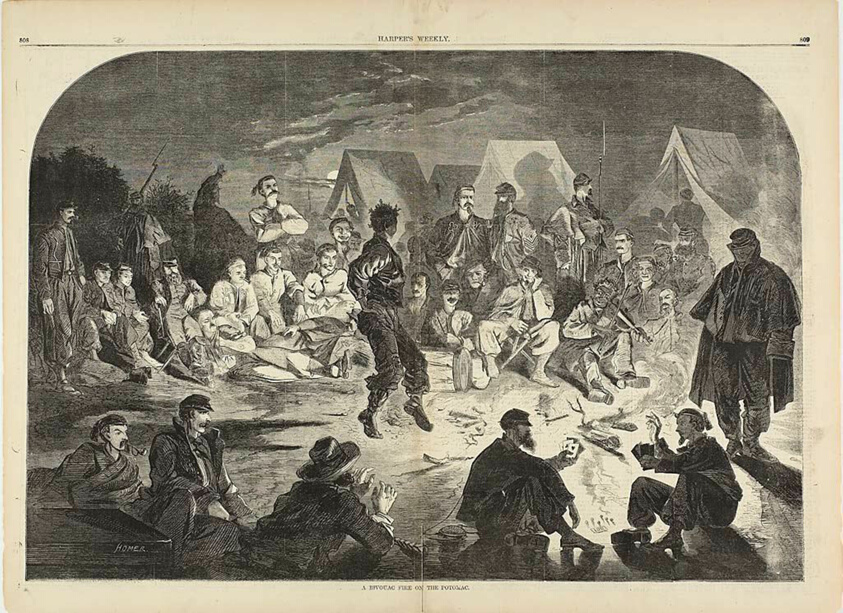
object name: Print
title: A Bivouac Fire on the Potomac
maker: Winslow Homer (American, 1836-1910); published by Harper's Weekly (American, 1857-1916)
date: published December 21, 1861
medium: Wood engraving on paper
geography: United States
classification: wood engraving; print; prints and drawing